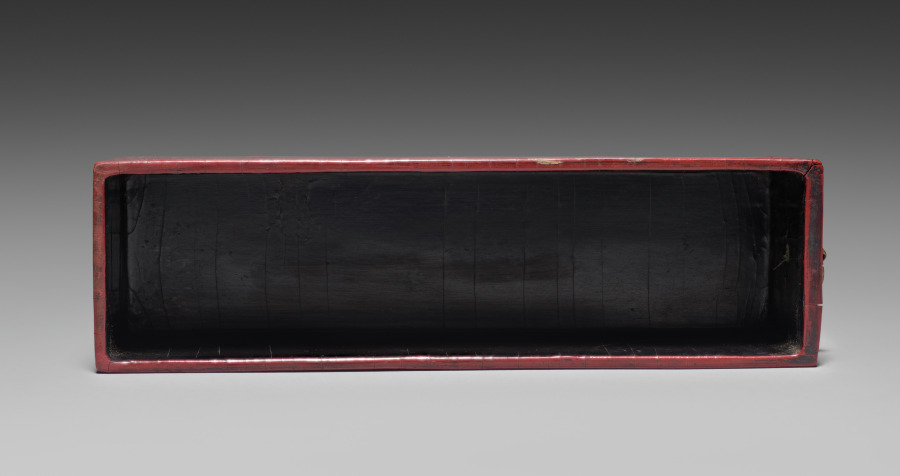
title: Drawer for a Tihong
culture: China, Ming dynasty (1368-1644), Wanli reign (1572-1620)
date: 1585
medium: carved cinnabar lacquer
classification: Lacquer